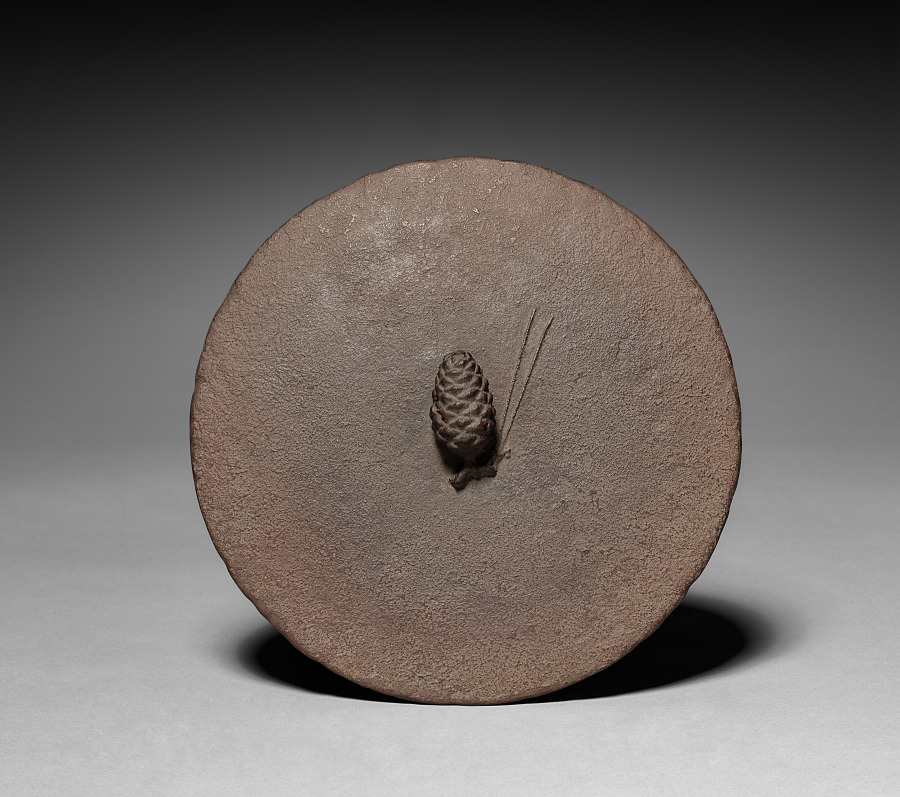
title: Kettle with Crane Design (lid)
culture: Japan, Muromachi period (1392–1573)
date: 1392–1573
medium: iron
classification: Metalwork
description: Water supplied from a jar such as the fine Shino-ware vessel (CMA 1972.9.a-b) was transferred to an iron kettle for boiling as part of the tea ceremony. Former CMA director Sherman Lee described the jagged, broken skirt of this kettle as "attractively damaged," complementing the unobtrusive wispy designs on its rough metal surface. The character of this kettle—worn, coarse, the "perfection" of symmetry destroyed—was cherished by tea masters for its powerful humility.